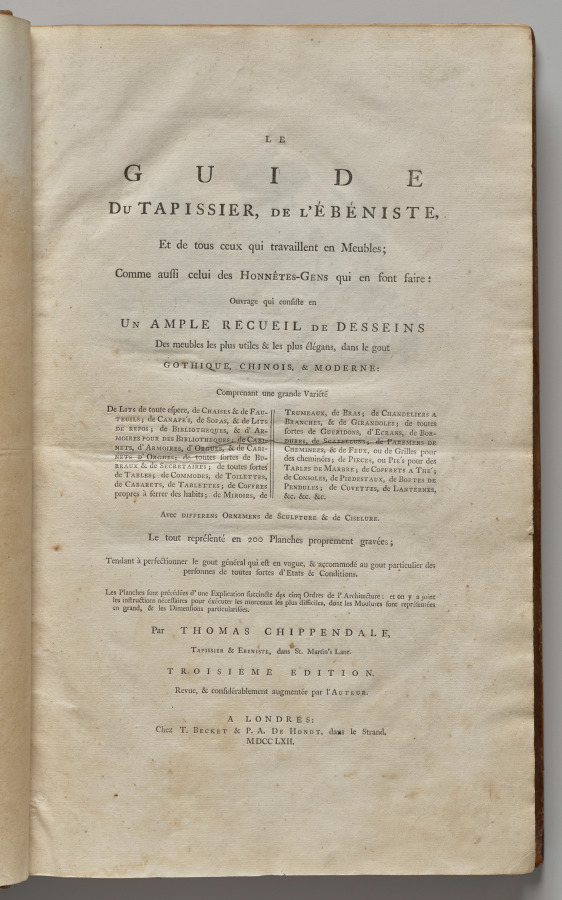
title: The Gentleman and Cabinet-Maker's Director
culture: Britain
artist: Thomas Chippendale (British, 1718–1779)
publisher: T. Becket & P. A. de Hondt (British)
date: 1762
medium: Paper, leather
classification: Bound Volume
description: Through his designs for furniture and architectural elements, Thomas Chippendale became one of the most influential tastemakers of the 1700s. He published three editions of The Gentleman and Cabinet-Maker’s Director (1754, 1755, and 1762), which sold widely in Britain, Ireland, and America. This rare French version of the third edition demonstrates his effort to spread his designs for both naturalistic and neoclassical decoration even wider across Europe.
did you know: Fewer than fifteen copies, including this one, of the French edition of Thomas Chippendale’s famous book of designs, are known to exist.